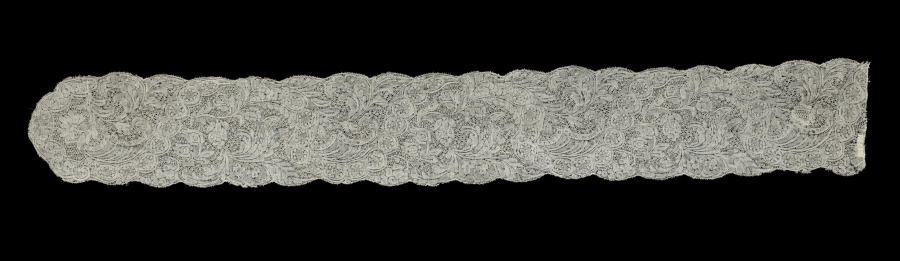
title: Lace Lappet (one of a pair)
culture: Belgium, Binche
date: 1700s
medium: Linen: bobbin lace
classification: Lace